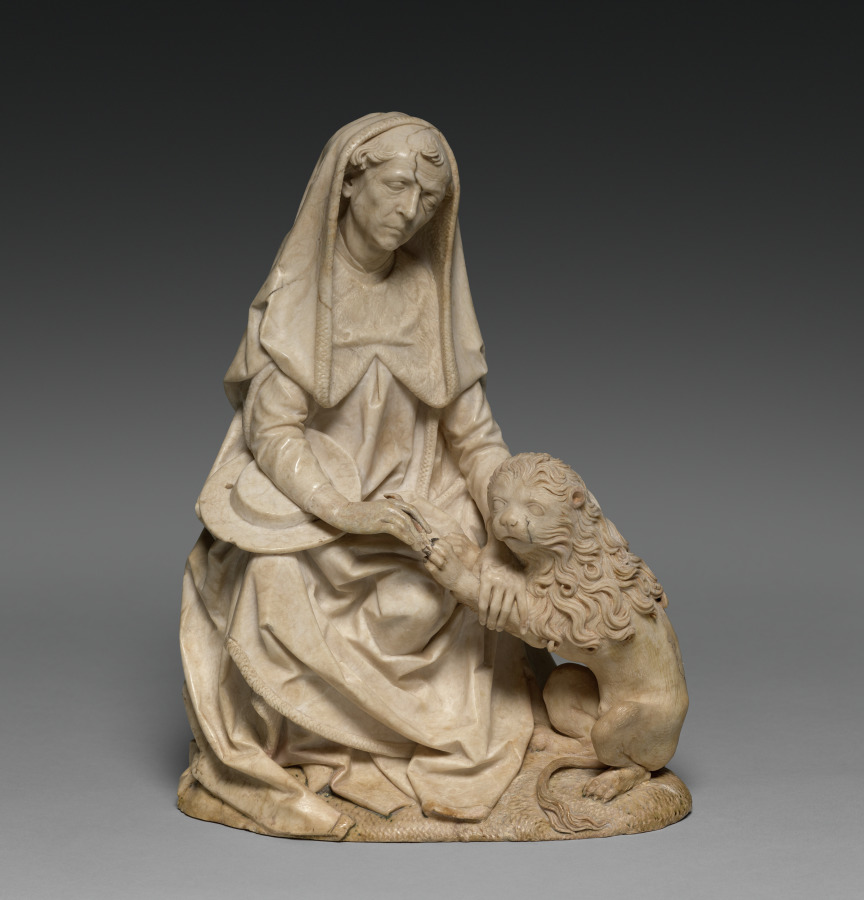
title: Saint Jerome and the Lion (From the former Church of St. Peter in Erfurt)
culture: Germany, Würzburg, late 15th Century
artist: Tilman Riemenschneider (German, active Würzburg, c. 1460–1531)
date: c. 1495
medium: alabaster, traces of polychromy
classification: Sculpture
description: According to legend, Saint Jerome (347–420 bce) lived in the desert, where he removed a thorn from an injured lion. Jerome is venerated in the Catholic Church as a Church Father, an important early author of Christianity. Here, he wears cardinal’s clothing from around 1500. Tilman Riemenschneider focused on Jerome’s relationship with the lion, creating empathy for the wounded animal. The delicacy of the depiction, which may have been partially painted to add highlights, is typical of alabaster, as is its fine polishing. The cord of the cardinal’s hat, missing today, may have been supplemented from another material.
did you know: In the story Saint Jerome encounters a fearsome lion, here depicted as diminutive, gentle, and submissive.